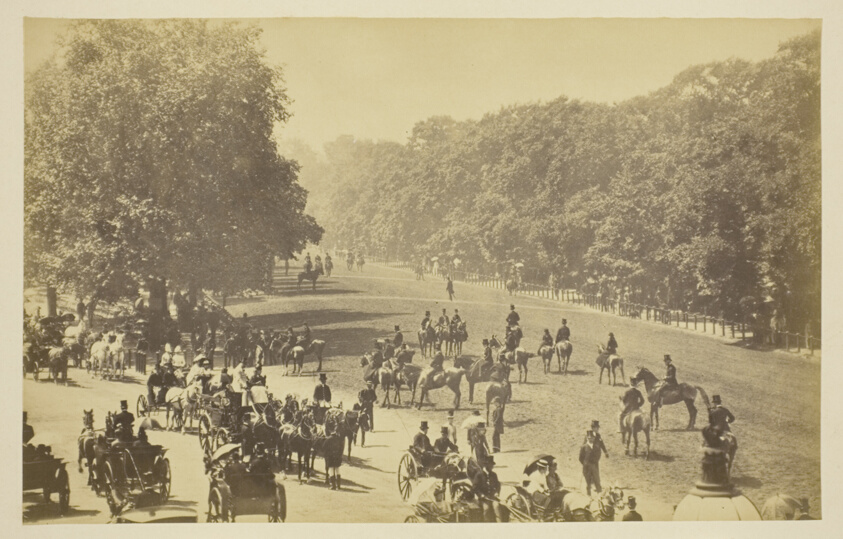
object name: Photograph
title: Rotten Row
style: 19th century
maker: Artist unknown; probably English, 19th century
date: 1850–1900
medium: Albumen print, from the album "Views of London"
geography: England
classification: albumen silver print; photographic process; photography; photograph